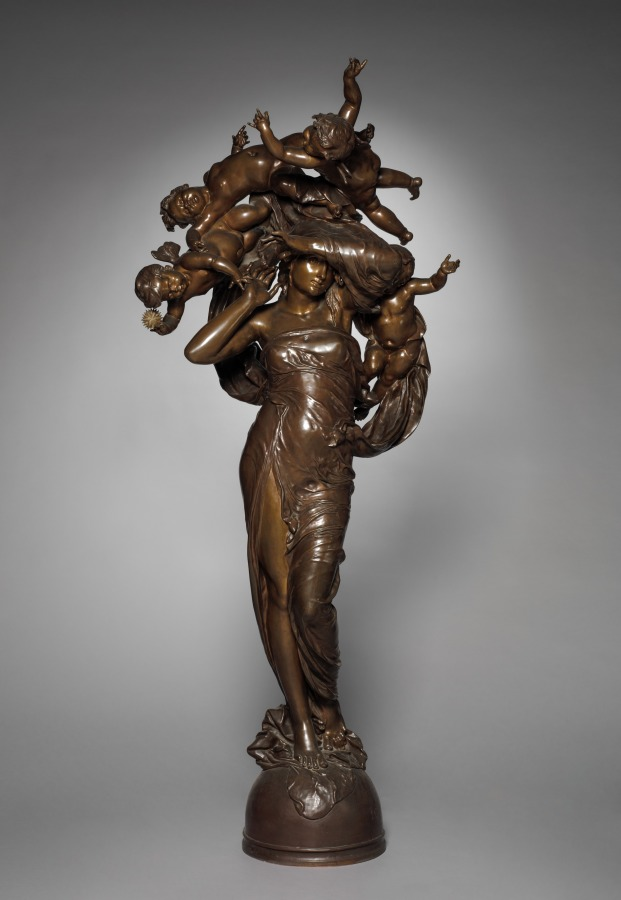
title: Dawn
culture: France, 19th century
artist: Gustave-Joseph Chéret (French, 1838–1894)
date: c. 1883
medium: bronze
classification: Sculpture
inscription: signed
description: This sculpture is of the same design as one exhibited by Chéret at the Paris Salon of 1883.